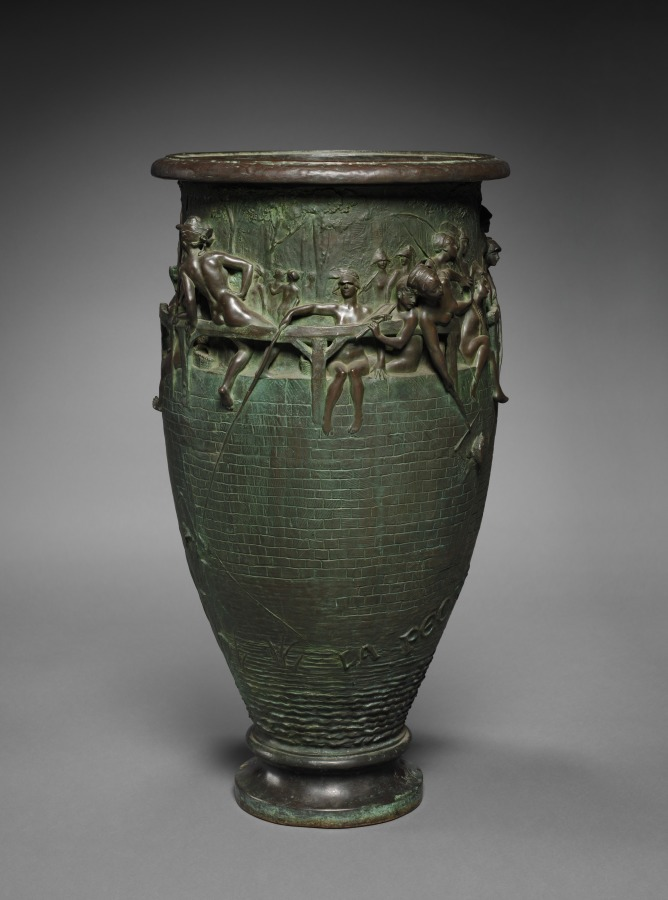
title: Vase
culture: France, 19th century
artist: Gustave-Joseph Chéret (French, 1838–1894)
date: c. 1890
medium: bronze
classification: Sculpture